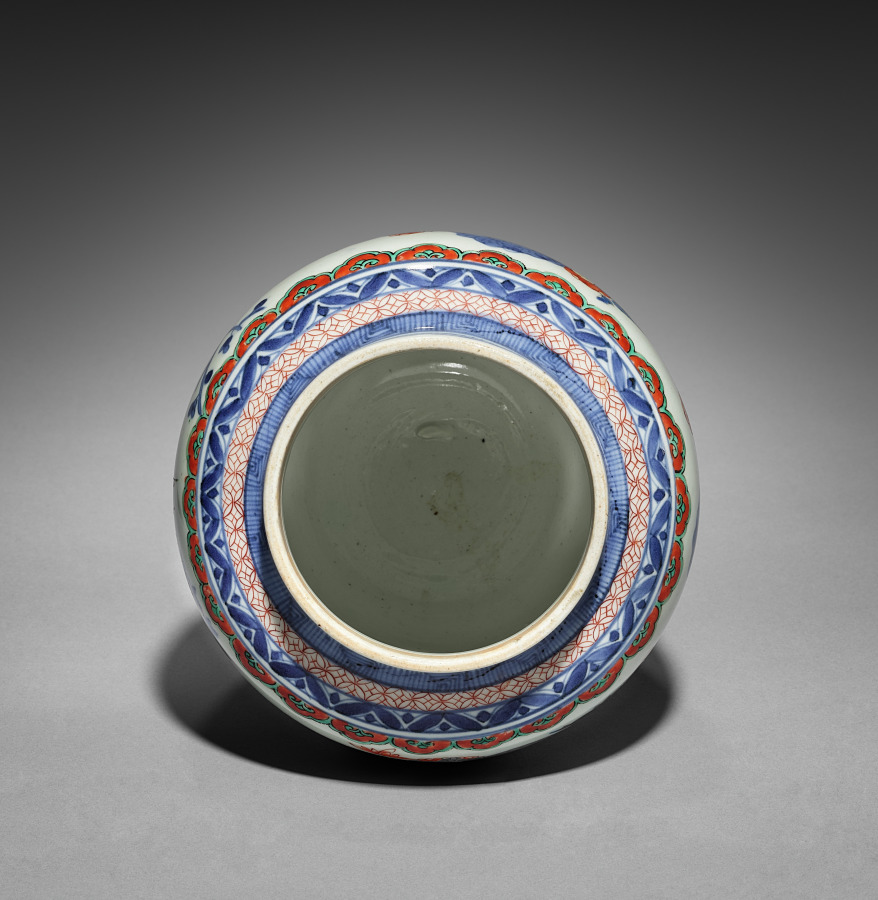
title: Covered Jar with Chrysanthemums, Peonies, and Plum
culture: Japan, Edo period (1615–1868)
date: late 1600s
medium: porcelain with underglaze blue and overglaze color enamel (Hizen ware, Kakiemon type)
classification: Ceramic